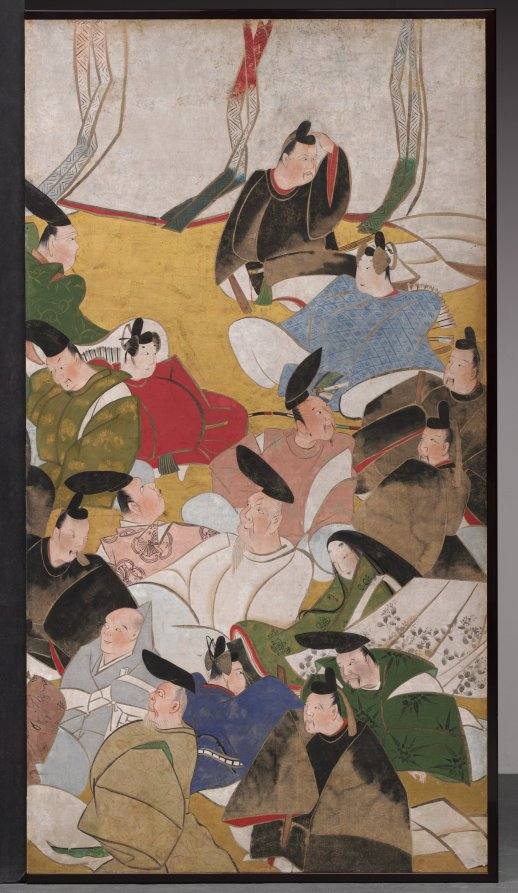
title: Thirty-Six Poetic Immortals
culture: Japan, Edo period (1615–1868)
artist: attributed to Tatebayashi Kagei (Japanese, active mid-1700s)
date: mid 1700s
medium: two-fold screen; ink, color, and gold on paper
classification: Painting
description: Fujiwara no Kintō (996–1075), a Japanese courtier, scholar, and poet, compiled select examples by the most celebrated composers of 31-syllable poems (waka) from the 600s to the 1000s. Painters soon made these “thirty-six poetic immortals” a favorite subject, traditionally presenting the poets in sequential, idealized portraits paired with their poems. In this interpretation, a chronologically impossible gathering of these great talents is in progress. The screen’s composition follows one devised by design virtuoso Ogata Kōrin (1658–1716).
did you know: The green surface edged with stripes at the upper left of the painting represents tatami matting with a silk border.